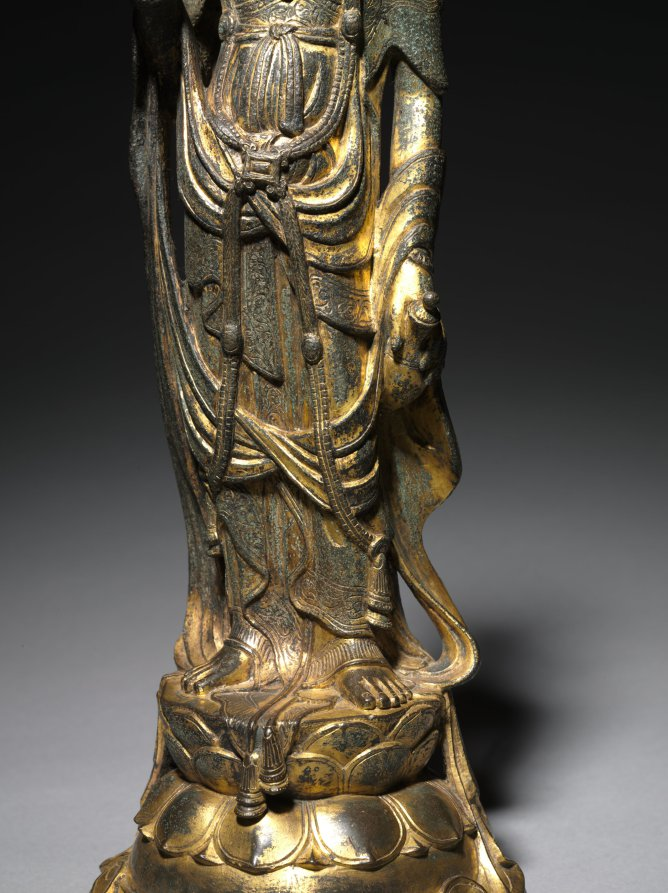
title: Bodhisattva Guanyin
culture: China, Liao dynasty (916-1125)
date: 900s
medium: gilt bronze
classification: Sculpture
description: In Buddhism, a bodhisattva is a being who, just before reaching enlightenment, turns back to assist others to reach enlightenment first. This bodhisattva holds his hand palm forward, in a gesture that tells followers not to fear. In his other hand he carries a bottle that holds the elixir of immortality.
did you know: The Liao rulers were devout Buddhists who commissioned substantial religious projects.